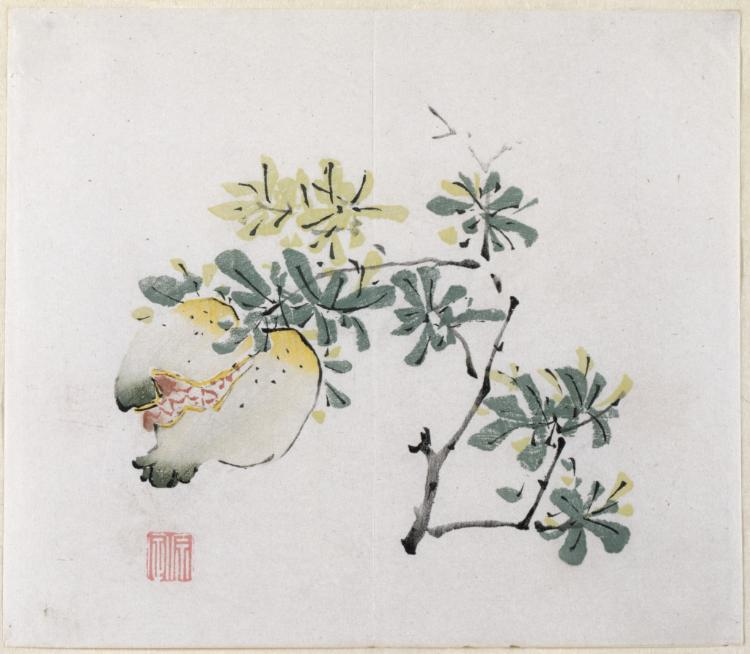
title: Branch with Pomegranate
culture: China, Qing dynasty (1644-1911)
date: 18th Century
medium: color woodblock print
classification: Print